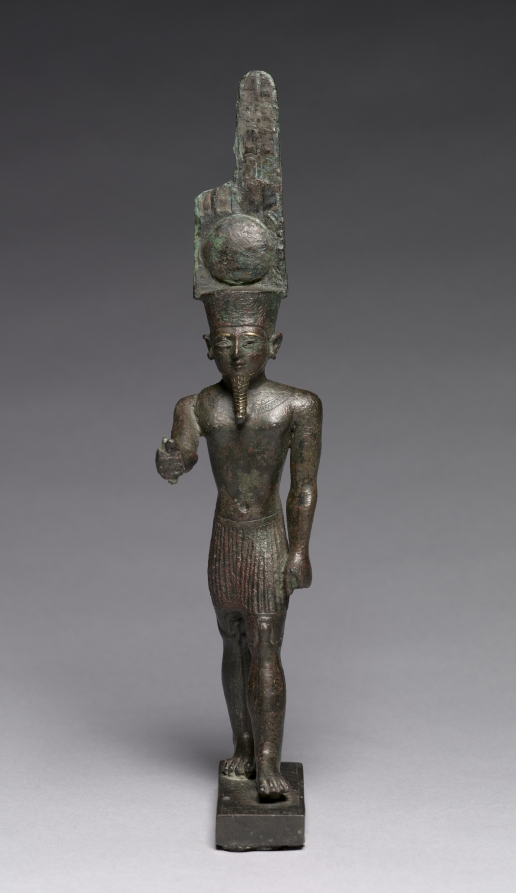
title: Statuette of Amen-Ra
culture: Egypt, Late period (715–332 BCE), Dynasty 26 or later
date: 664–30 BCE OR 664–330 BCE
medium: bronze, solid cast, inlaid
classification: Sculpture